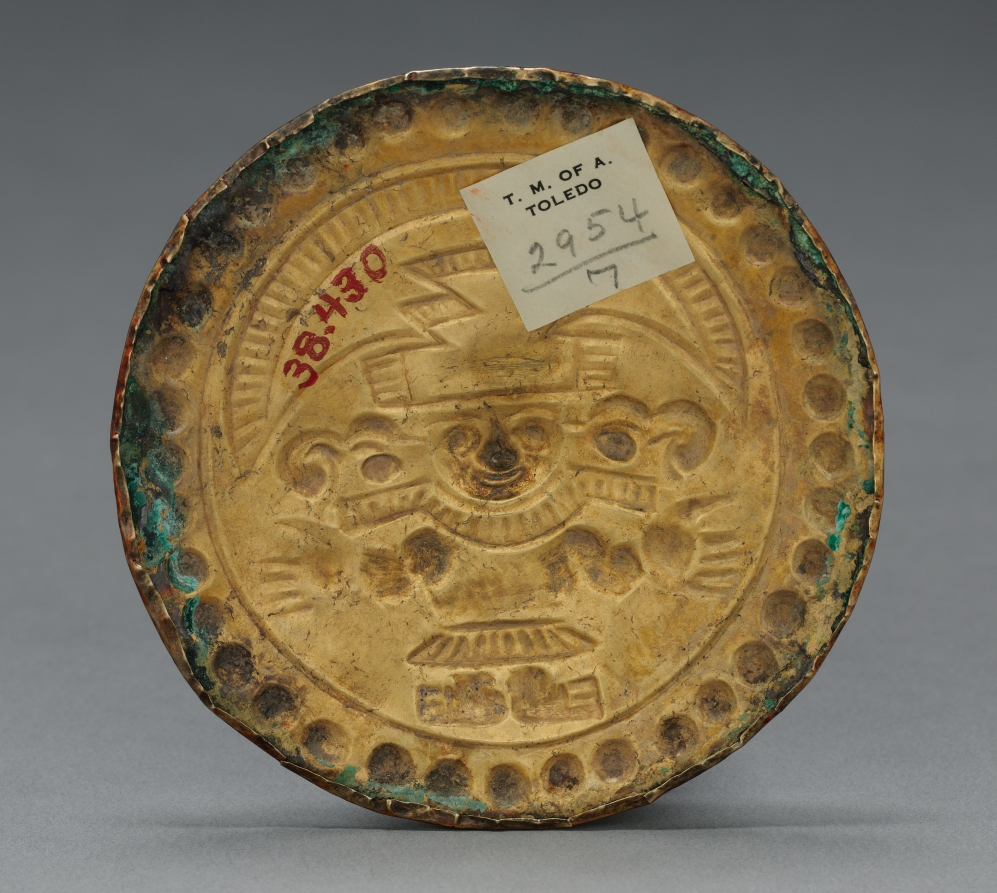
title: Ear Flare Frontal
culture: Peru, North Coast, Paramonga(?), Chimú style (900-1470)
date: Chimú style (900–1470)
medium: hammered gold alloy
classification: Jewelry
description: These gold discs, each with the image of a richly dressed Chimú lord, originally were attached to the fronts of ear ornaments equipped with long, thick shafts that passed through the ear lobes. Such ornaments were important markers of wealth and elite status.